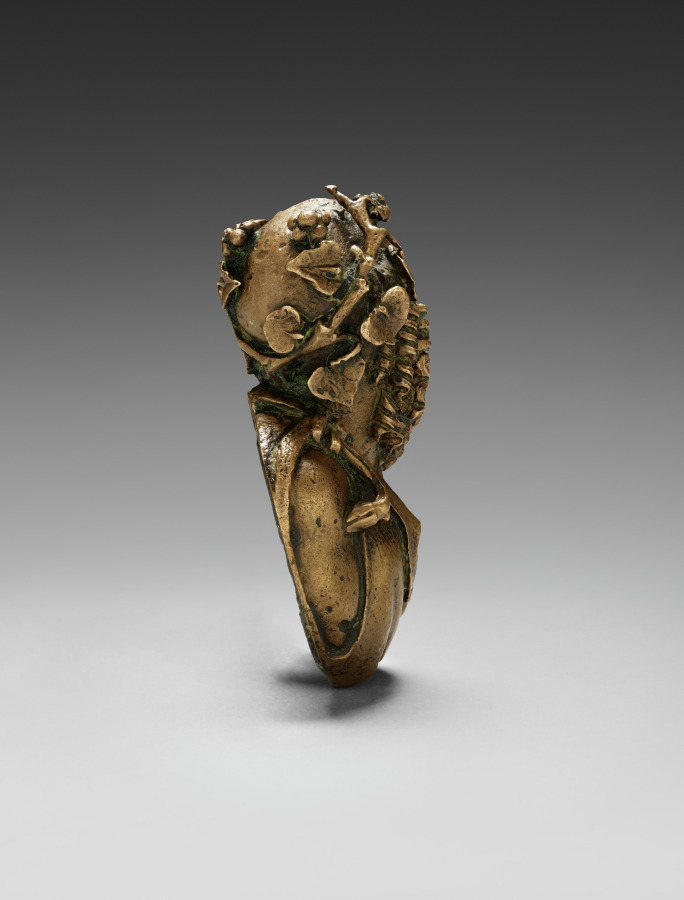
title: Silenus Bust for a Couch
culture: Italy, Roman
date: 1–125 CE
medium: bronze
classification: Sculpture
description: This bust of Silenus was part of the fulcrum or armrest of an ancient Roman couch. Silenus was the tutor and companion of Bacchus, the Roman god of wine. He is shown with a long curly beard, bushy eyebrows, and wearing a garland of ivy vines with berries. His deerskin robe, tied by the animal’s hoof, falls off his shoulder, suggesting drunkenness. The bust would have been placed at the base of the armrest where it met the seat of the couch, while an animal head likely decorated the top. As is the case with many Roman objects, Romans adapted their couch style and decoration from the Greeks.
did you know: This silenus’s beard is made up of exactly ten ringlets of curls.